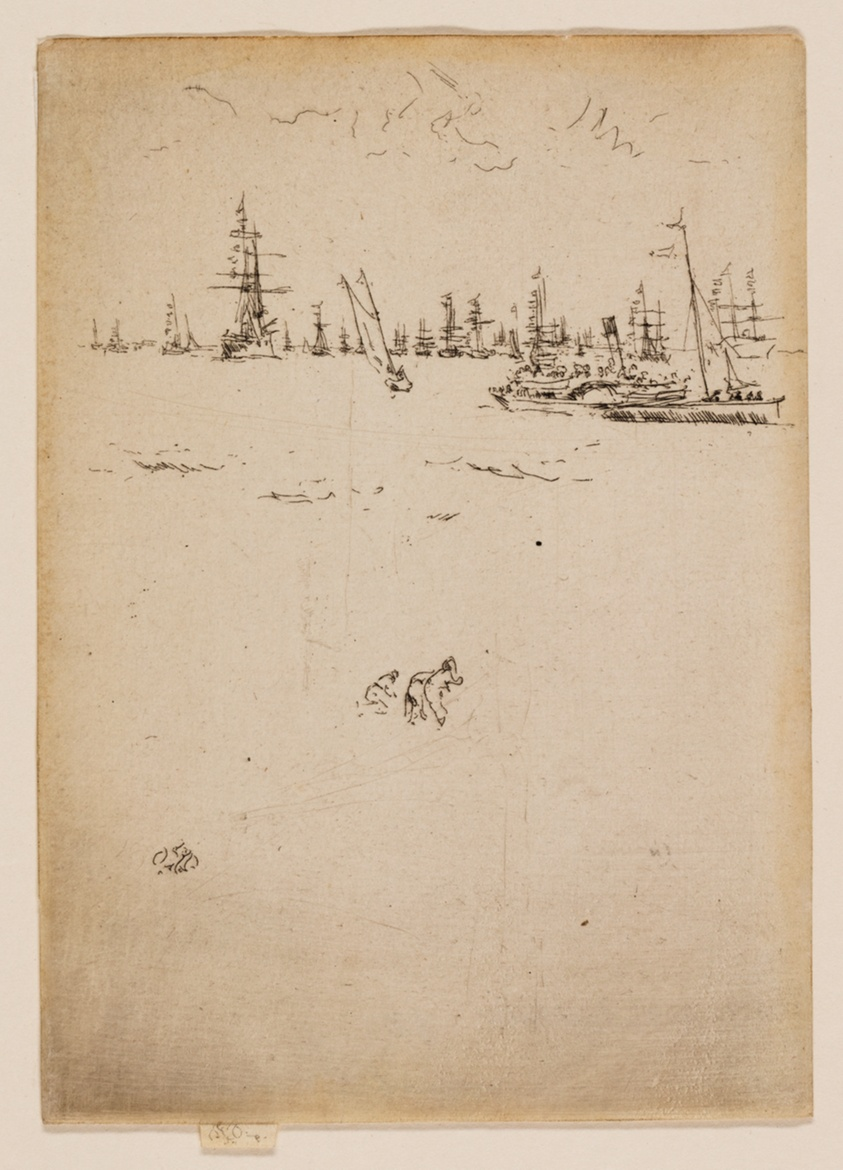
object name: Print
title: The Visitors' Boat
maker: James McNeill Whistler (American, 1834-1903)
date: 1887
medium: Etching with foul biting in black ink on ivory laid paper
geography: United States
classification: etching; foul biting; print; prints and drawing; paper